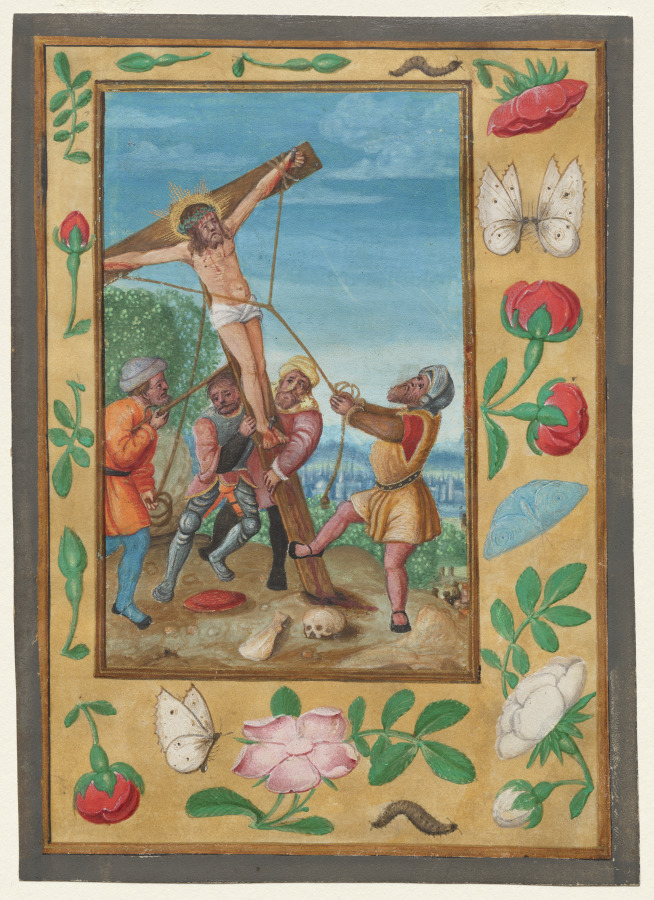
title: Leaf from a Book of Hours: The Raising of the Cross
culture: Germany, Nuremberg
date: c. 1510–20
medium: tempera and liquid gold on vellum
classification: Manuscript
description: This finely painted miniature is the work of an artist familiar with the designs of Albrecht Dürer (1471–1528). Though not deriving from a known engraving or drawing, the style, composition, and especially the modeling of the figure of Christ refer to the draftsmanship and tonalities found in Dürer's works. This miniature depicts the moment the cross is raised. In the foreground, thuggish brutes struggle to bring it upright. The skull of Adam at the foot of the cross signifies that Golgotha was Adam's burial place. In the background, a vivid blue sky recedes into pink as it meets the horizon and a distant town. The inclusion of an illusionistic, trompe l'oeil border, strewn with flowers and butterflies on a gold ground, follows the tradition of Ghent and Bruges, where such borders were first developed during the 1470s and 1480s.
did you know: Books of hours were devotional books popular in the Middle Ages and meant for laypeople, or those not in the clergy.